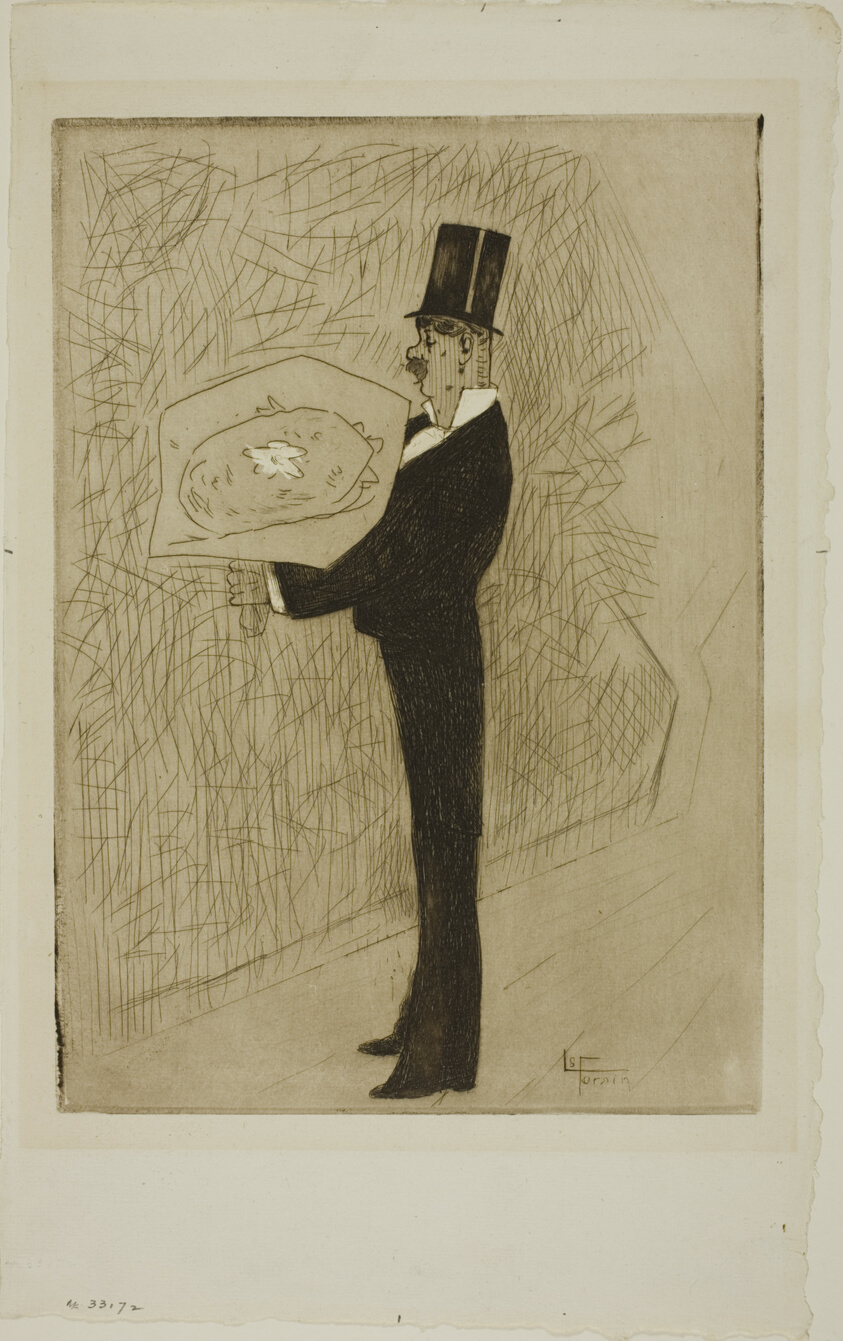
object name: Print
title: The Toff with a Bouquet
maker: Jean Louis Forain (French, 1852-1931)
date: c. 1876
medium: Etching in dark brown with plate tone on ivory laid paper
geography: France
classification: etching; print; prints and drawing